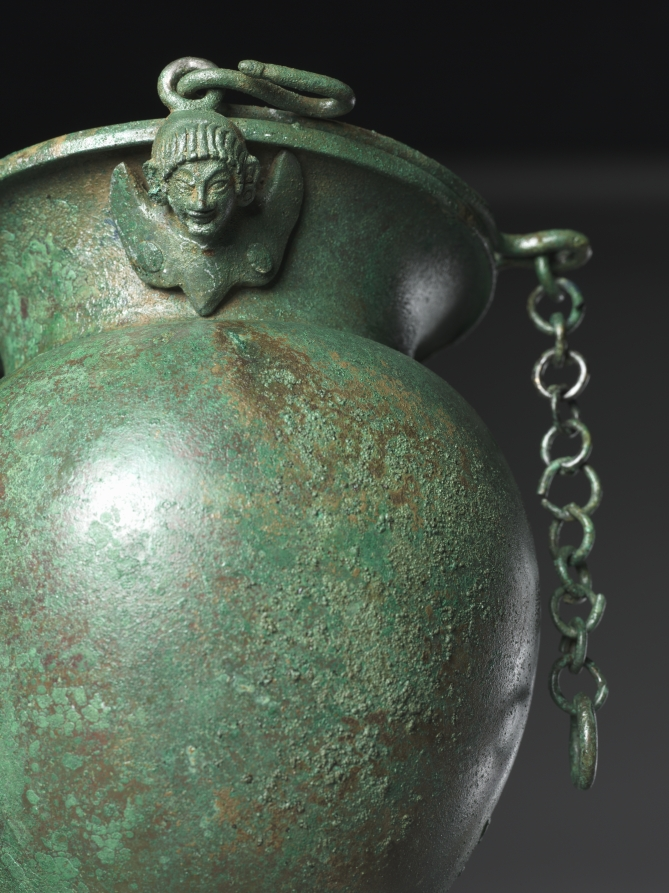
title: Situla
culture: Etruscan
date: c. 525–450 BCE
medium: bronze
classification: Metalwork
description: Known as a situla, or bucket, this bronze vessel features an ovoid body with a flaring neck. The separately made foot is quite elaborate and unusually shaped for this type of vessel. More typical is the handle, designed to swing upward from its two attachments, each finely cast in the form of a frontal siren with earrings and very small, simplified wings.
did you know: The handle includes a loop with attached chain, perhaps meant for hanging.